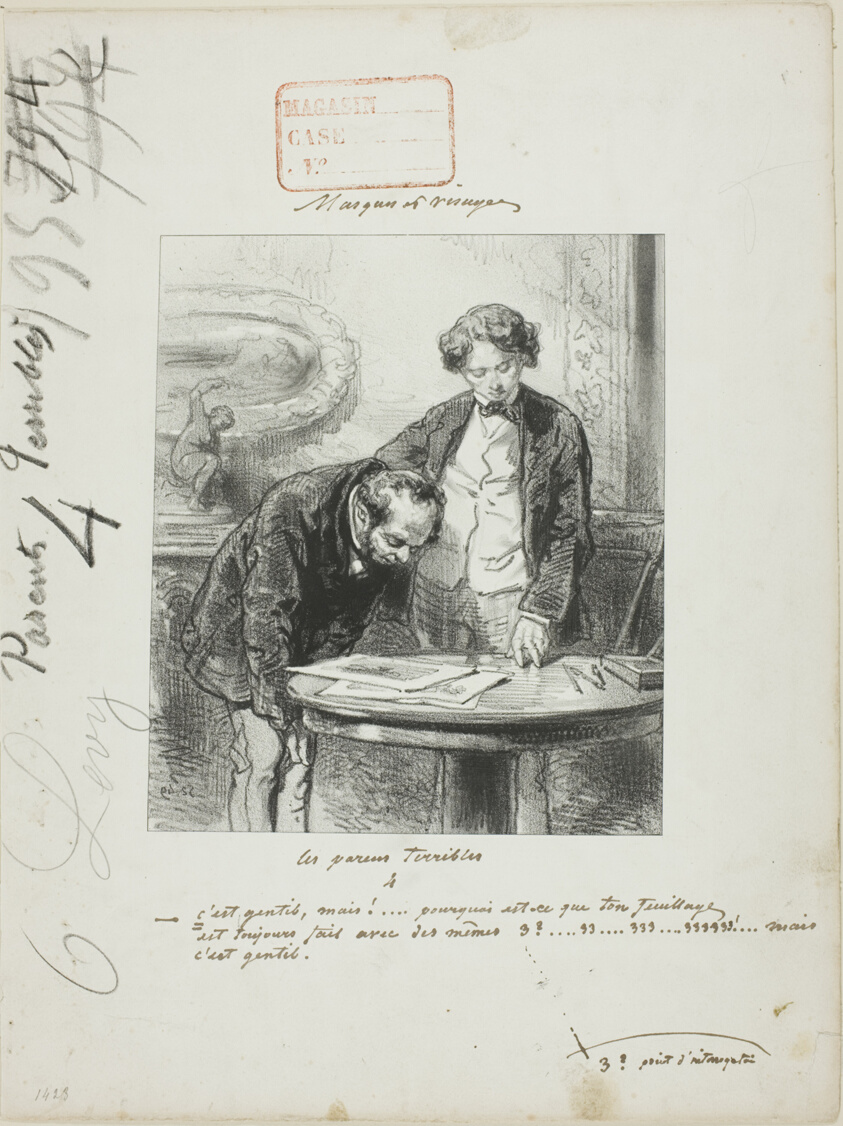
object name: Print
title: Les-Parents-Terribles series: It's Pretty, But...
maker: Paul Gavarni (French, 1804-1866)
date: 1852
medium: Lithograph in black on cream wove paper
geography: France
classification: lithograph; print; prints and drawing